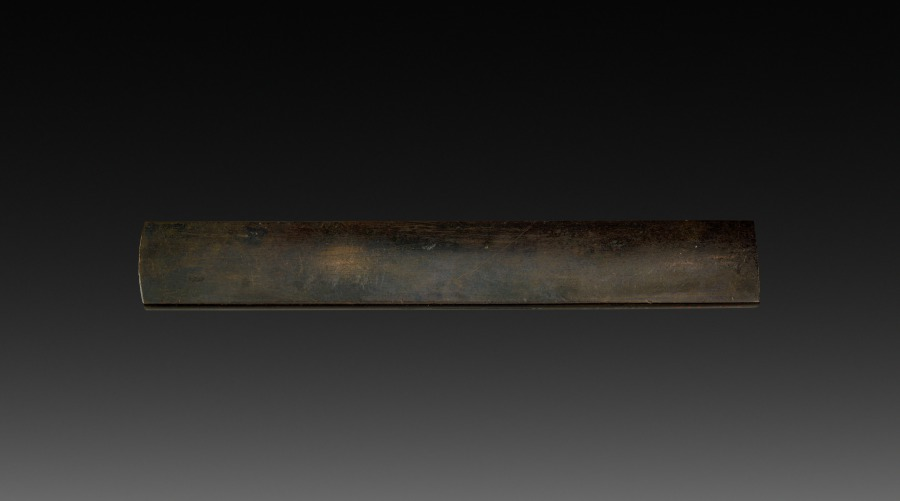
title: Knife Handle (Kozuka)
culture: Japan, Edo period (1615–1868)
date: early to mid-1800s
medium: inlaid bronze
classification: Metalwork